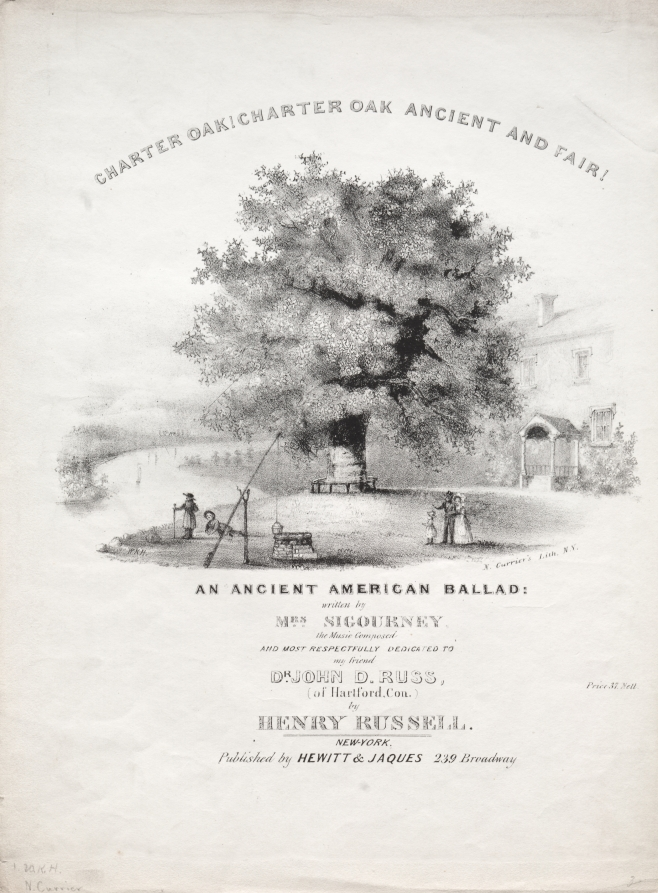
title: Charter Oak! Charter Oak Ancient and Fair!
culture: America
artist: Nathaniel Currier (American, 1813–1888)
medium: lithograph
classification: Print